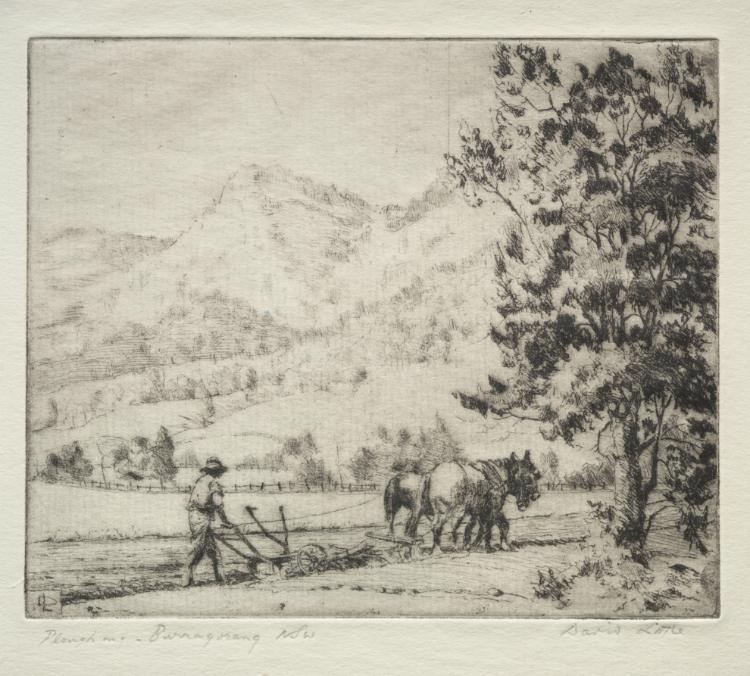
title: Ploughing - Burragorang, New South Wales, Australia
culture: England, 20th century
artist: David Little (Australian, 1893–1951)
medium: etching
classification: Print